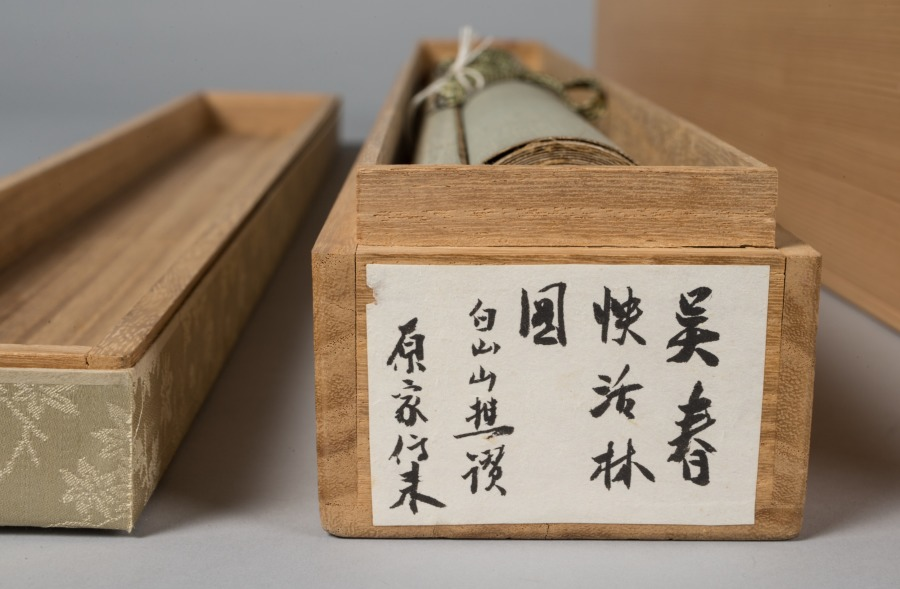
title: Happy Forest, from Water Margin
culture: Japan, Edo period (1615–1868)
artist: Matsumura Goshun (Japanese, 1752–1811)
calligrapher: and Amenomori Shōteki (Japanese, 1731–1786)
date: late 1700s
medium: hanging scroll; ink and color on paper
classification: Painting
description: The Chinese literary classic Water Margin is set in the 1120s and tells the story of 108 outlaws who first rebel against the government and then join forces with it. This painting depicts an episode in which hero Wu Song reclaims the tavern Happy Forest for its rightful owner, the prison warden’s son, Shi En. To prepare for the fight, Wu Song drinks a lot of wine. The painting was inscribed with a quote in which an ally describes Wu Song’s fighting style. It reads as follows: Where his twin fists rise, clouds and thunder roar, When his flying kick comes, wind and rain tremble.